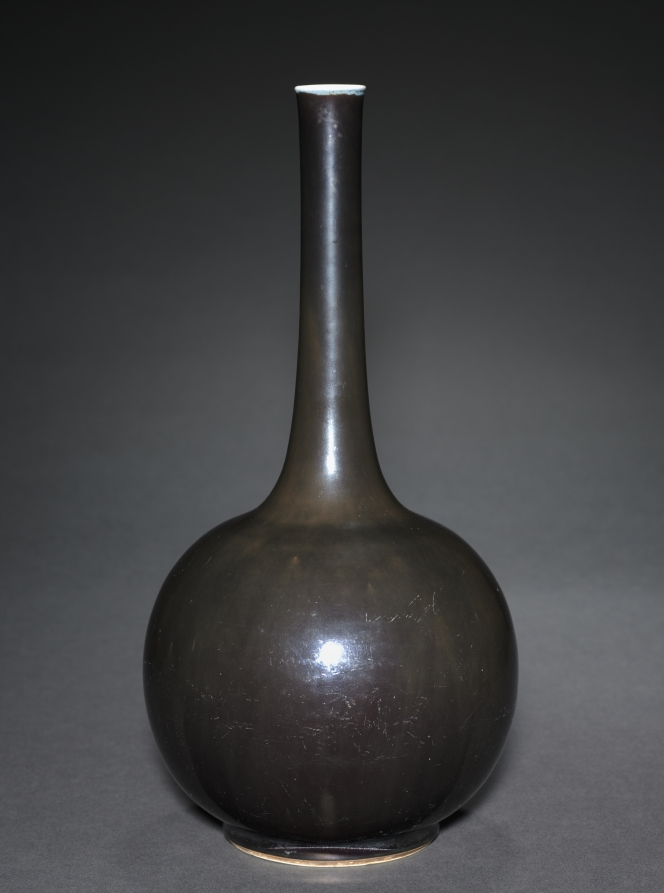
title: Globular Vase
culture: China, Qing dynasty (1644-1911)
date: 1644–1911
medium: glazed porcelain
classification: Ceramic